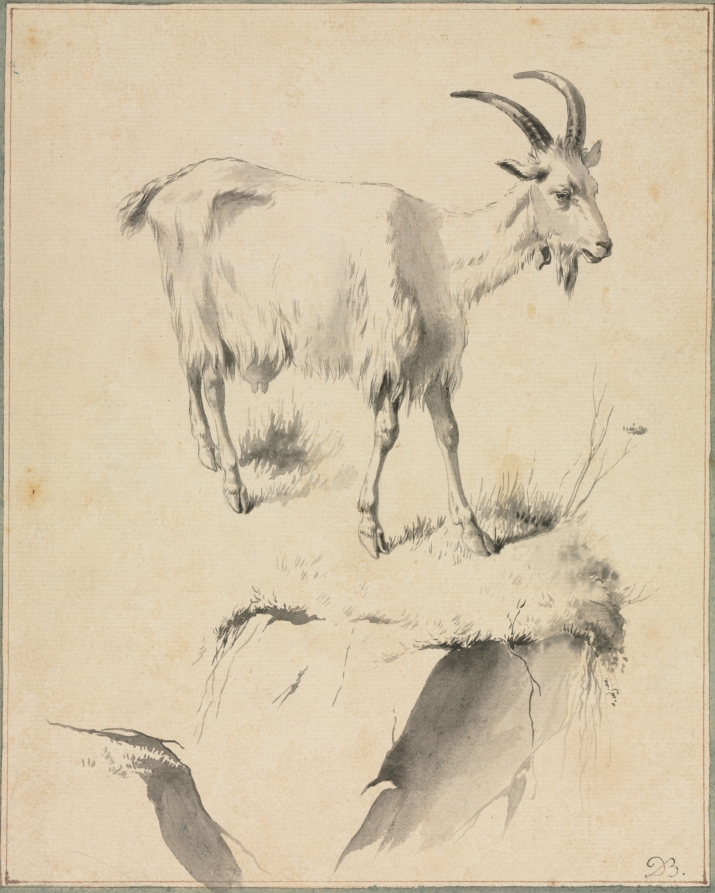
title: Study of a Goat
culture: France, 18th-19th century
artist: Jean Jacques de Boissieu (French, 1736–1810)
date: 1700s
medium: black ink and gray ink wash and point of brush work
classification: Drawing